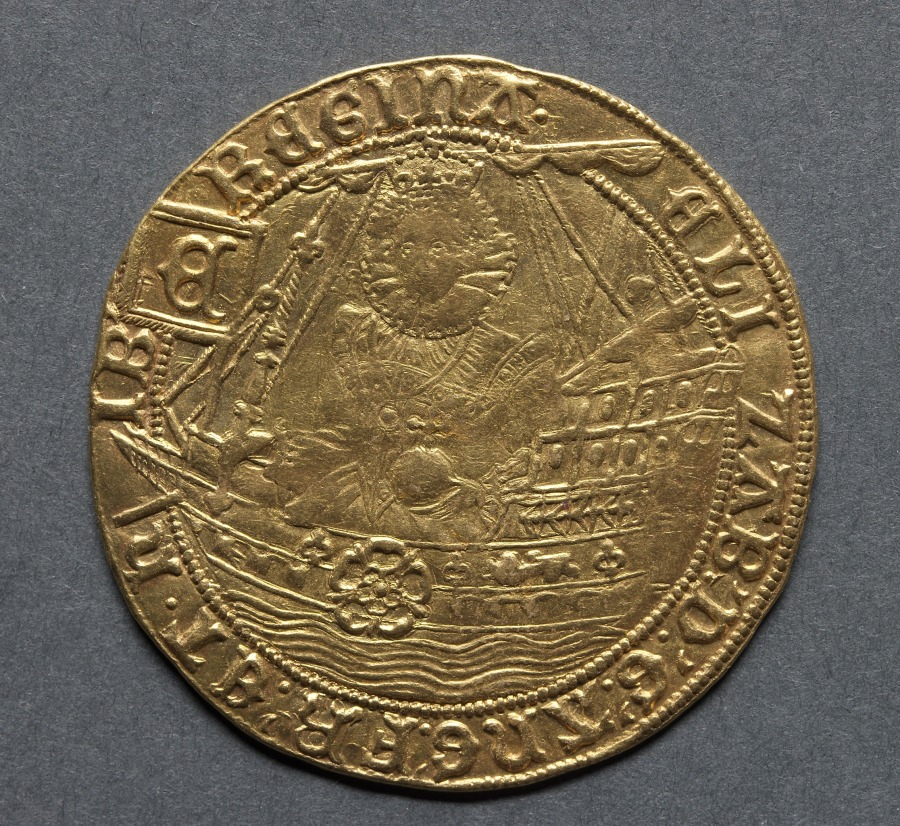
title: Ryal: Elizabeth I in Ship (obverse); Rose over Radiate Sun (reverse)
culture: England, Elizabeth I, 1558-1603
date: 1583–84/85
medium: gold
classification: Coins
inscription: ELI ZAB; D; G; ANG; FR; ET. H IB REGINA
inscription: IHS; AVT; TRANSIENS. PER. MEDIV; ILLORVM. IBAT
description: An excellent specimen of a very rare coin, the figure of the queen is full of minute detail. Elizabeth I is shown sailing on a ship; she holds an orb and scepter. A rose appears on the hull of the ship and an E on the banner located on the bow. Produced at the climax of her reign, the design was chosen to demonstrate England's superior naval power and colonization of what would become the United States of America.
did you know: The ryal, 15 shillings, was the rarest denomination and was minted in exceedingly small numbers.